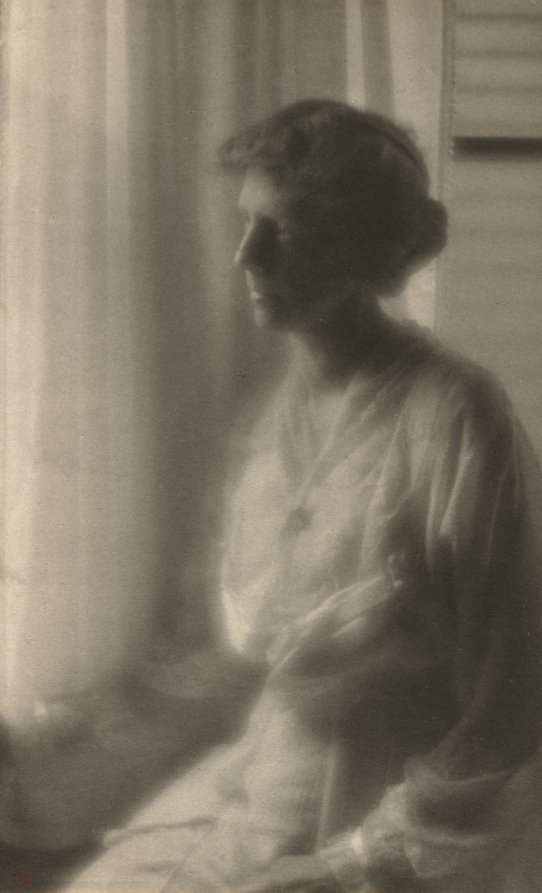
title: Eleanor Brown McCune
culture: America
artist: Clarence H. White (American, 1871–1925)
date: 1915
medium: platinum print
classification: Photograph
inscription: Written in red ink on recto: "CHW"; in pencil on recto: "Clarence H. White [signed] '15"